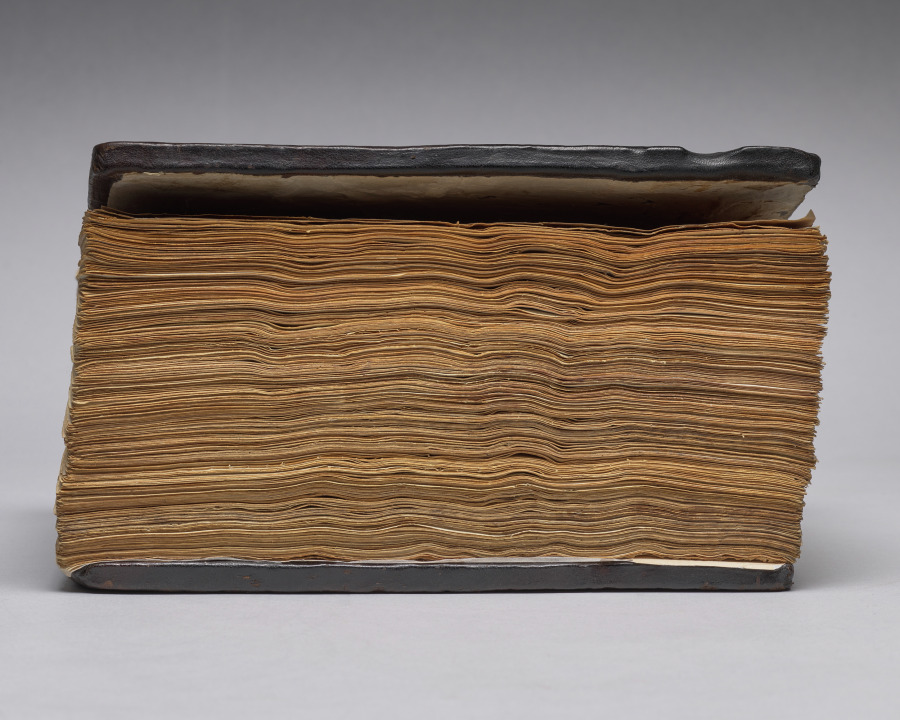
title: Gospel Book with Commentaries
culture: Byzantium, Constantinople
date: c. 1000–1100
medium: ink, tempera, and gold on vellum; leather binding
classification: Bound Volume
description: Each of the four Gospels in this book opens on a page with brilliantly illuminated borders depicting the author of the text as well as birds—principally peacocks, symbols of the immortality of the soul— and fountains, representing the fountain of life and the salvation of the soul. This volume consists of 428 leaves with texts in Greek. Its high level of sophistication is characteristic of monasteries in Constantinople.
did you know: Gospel Books were carried in procession through Byzantine churches.